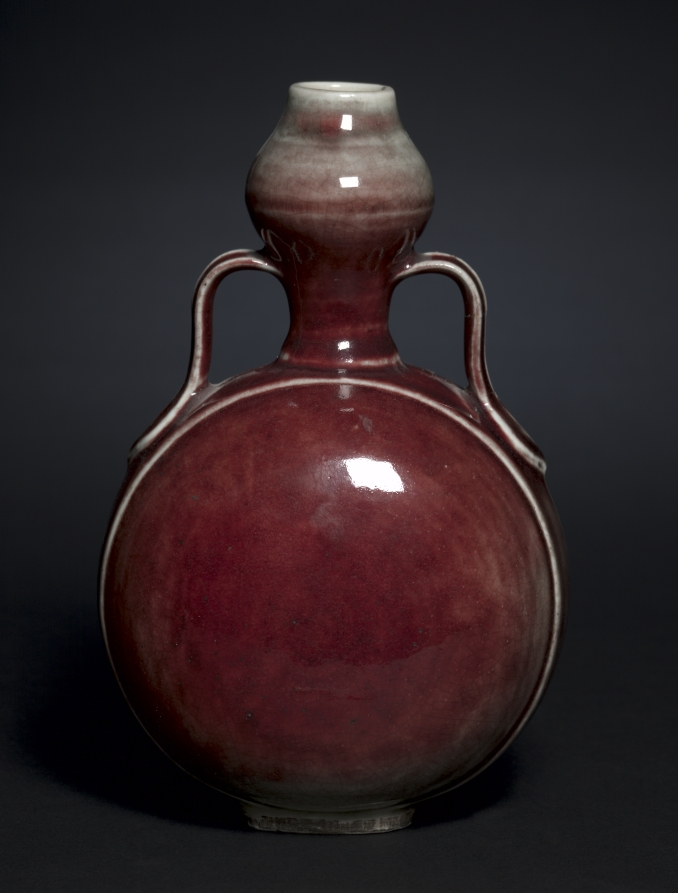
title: Gourd Flask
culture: China, Jingdezhen, Jiangxi province, Qing dynasty (1644–1911), Kangxi reign (1662–1722)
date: 1662–1722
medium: porcelain, Lang ware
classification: Ceramic